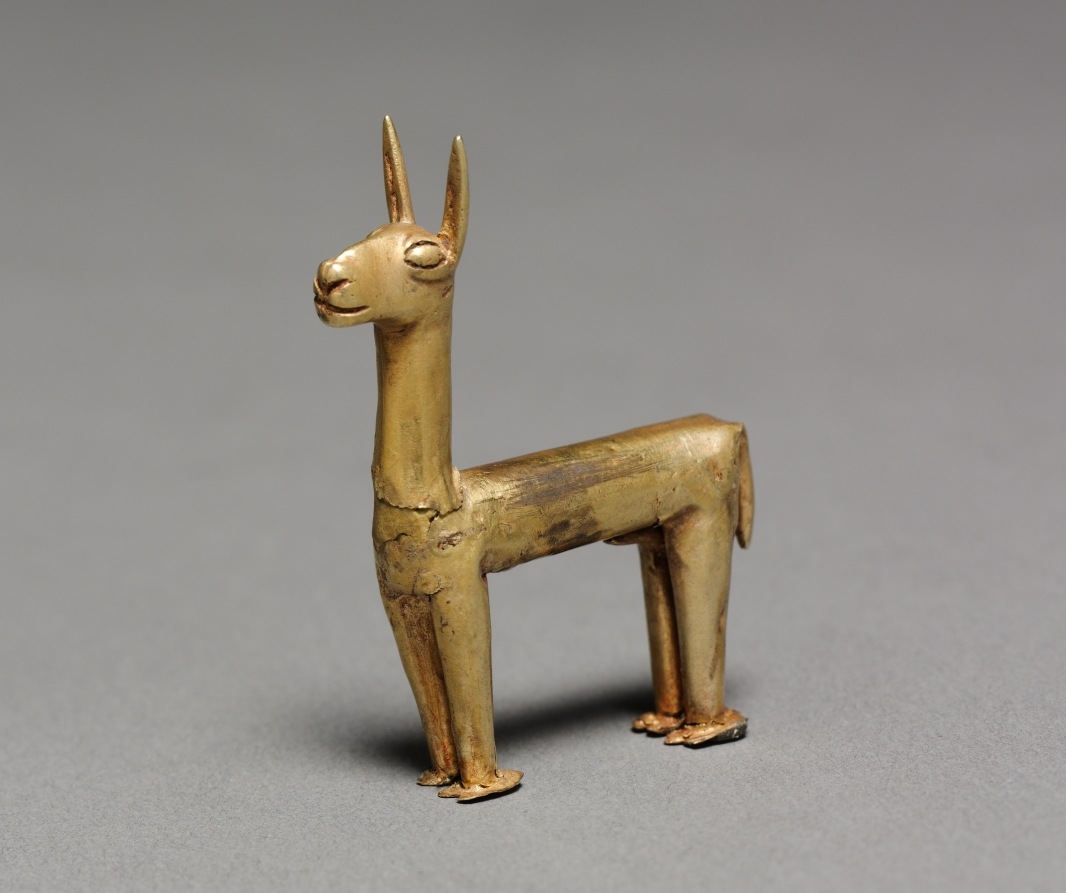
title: Llama Figurine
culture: Peru, Bolivia, Chile or Ecuador, Inka style (1400-1532)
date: 1400–1532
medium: hammered gold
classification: Metalwork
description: Precious metal was a major Inka artistic medium, but most was melted down after the conquest to fund the Spanish court. The sole remains are small-scale objects from tombs and offerings. Figurines in gold, like this one, have been found at shrines on sacred mountain peaks, where they accompanied child sacrifices in offerings made during times of crisis, such as famine.